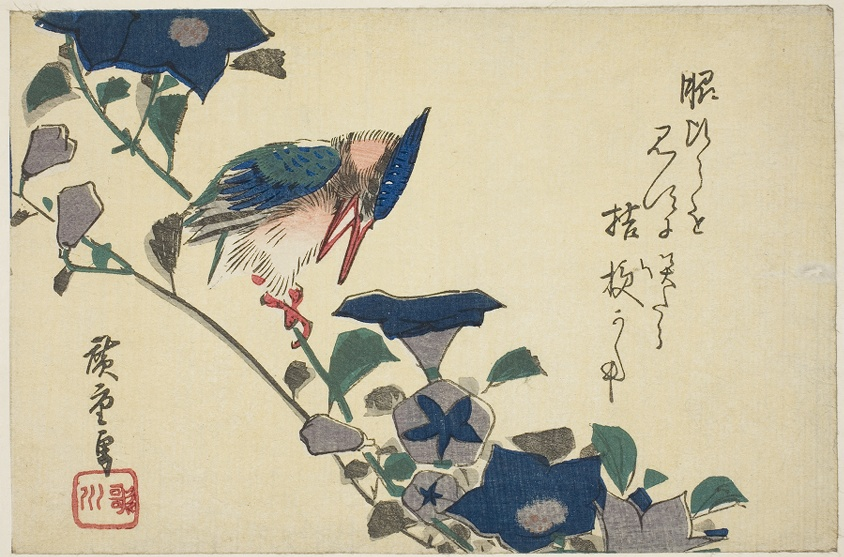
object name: Print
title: Kingfisher and bellflowers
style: Japanese (culture or style)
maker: Utagawa Hiroshige 歌川 広重; Japanese, 1797-1858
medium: Color woodblock print; yotsugiriban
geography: Japan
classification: woodblock print; print; asian art